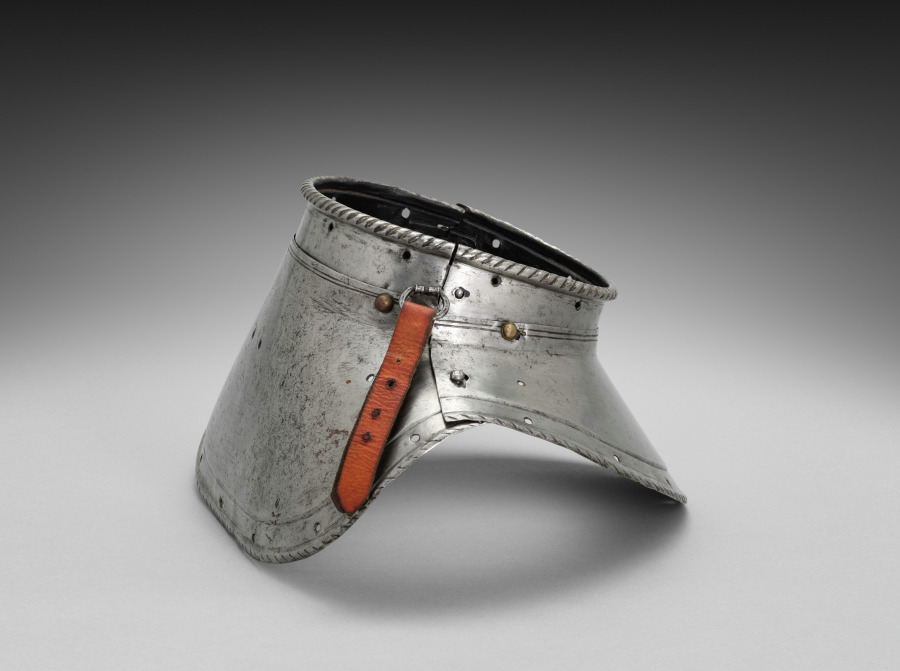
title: Colletin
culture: Germany, 19th century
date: 1801–1900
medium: steel with black paint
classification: Arms and Armor